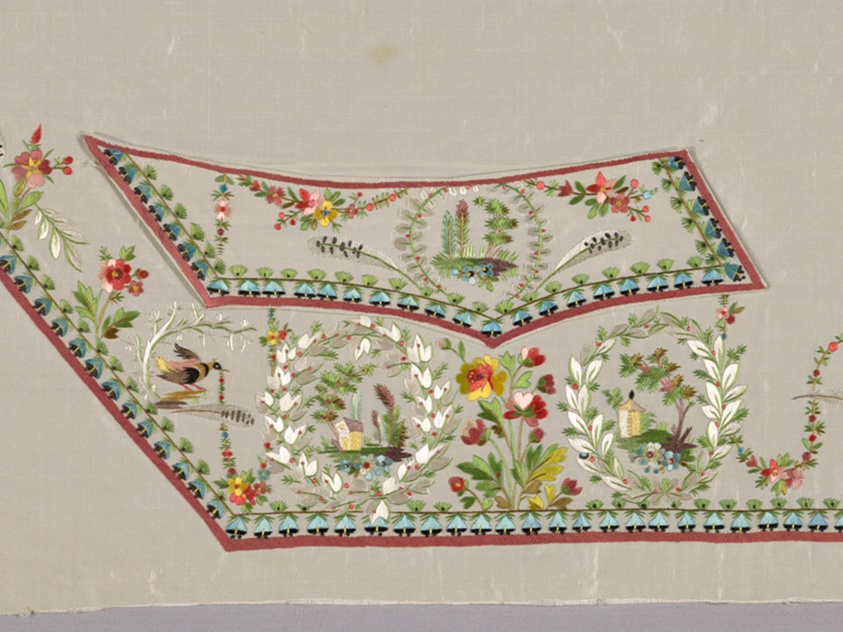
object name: Costume and Accessories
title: Embroidered Fabric for a Man's Waistcoat Front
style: 18th Century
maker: France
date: 1780s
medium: Silk, plain weave; embroidered with silk thread in individual back, outline, running, satin, split and stem stitches; couching; laid work and French knots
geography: France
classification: costume; needlework (visual works); waistcoat (garment); textile; costume - embroidery; needlework - costume; garment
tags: floral motifs, flowers, foliage, white (color), green (color), pink (color), building, floral, bird, wreaths, feathers, fashion, houses